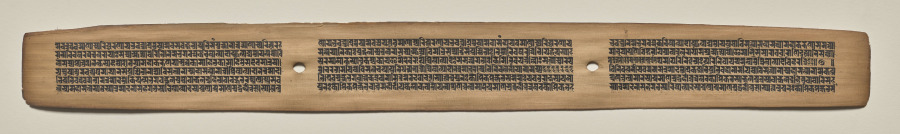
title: Text, folio 153 (recto), from a Manuscript of the Perfection of Wisdom in Eight Thousand Lines (Ashtasahasrika Prajnaparamita-sutra)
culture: Eastern India, Bihar, Vikramashila Monastery. Painting: Nepal, Kathmandu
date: Sunday, September 14, 1119 (year 239 of the Newar Samvat in the month of Ashvina)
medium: gum tempera and ink on palm leaves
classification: Painting